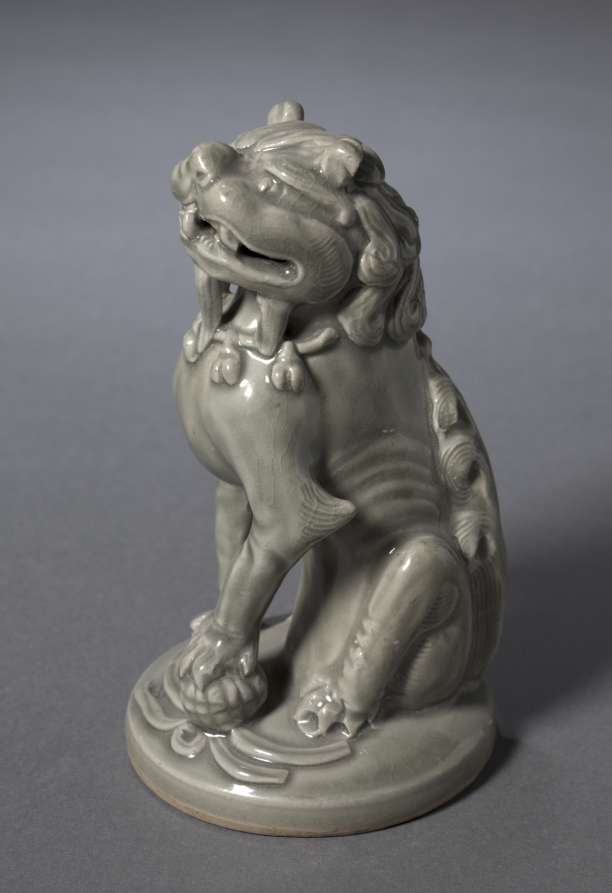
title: Incense Burner Top in the Shape of a Lion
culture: China, Shaanxi province, Northern Song dynasty (960-1127)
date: 1100s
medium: green-glazed porcelaneous stoneware, Yaozhou ware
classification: Ceramic